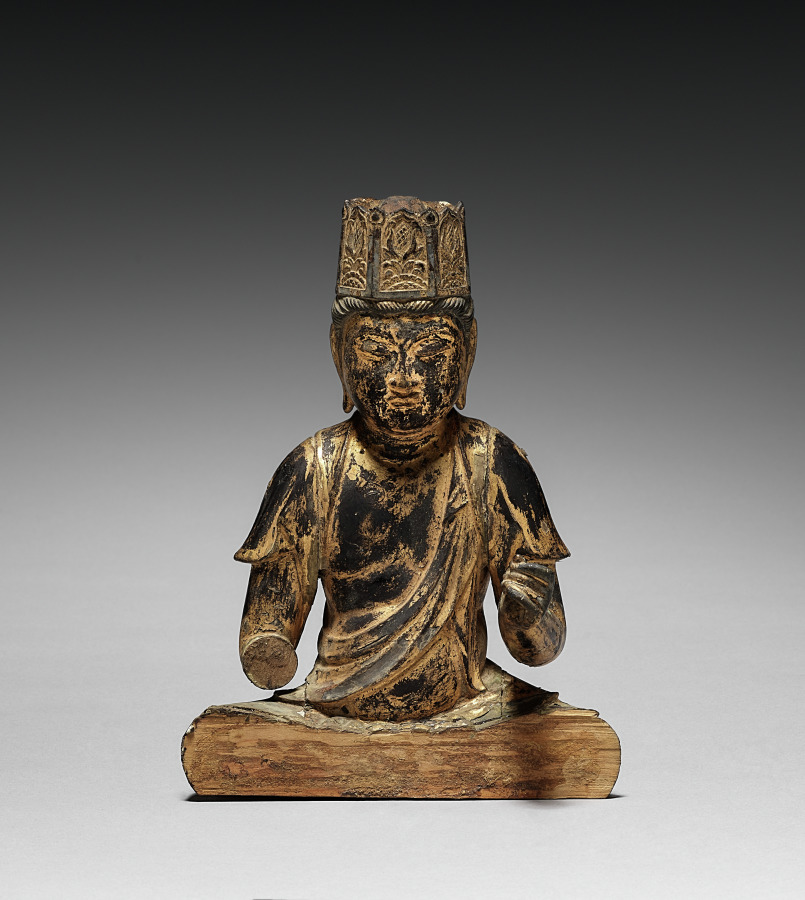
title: Bodhisattva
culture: Japan, Heian period (794–1185)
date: 900s–1100s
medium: gilded wood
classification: Sculpture